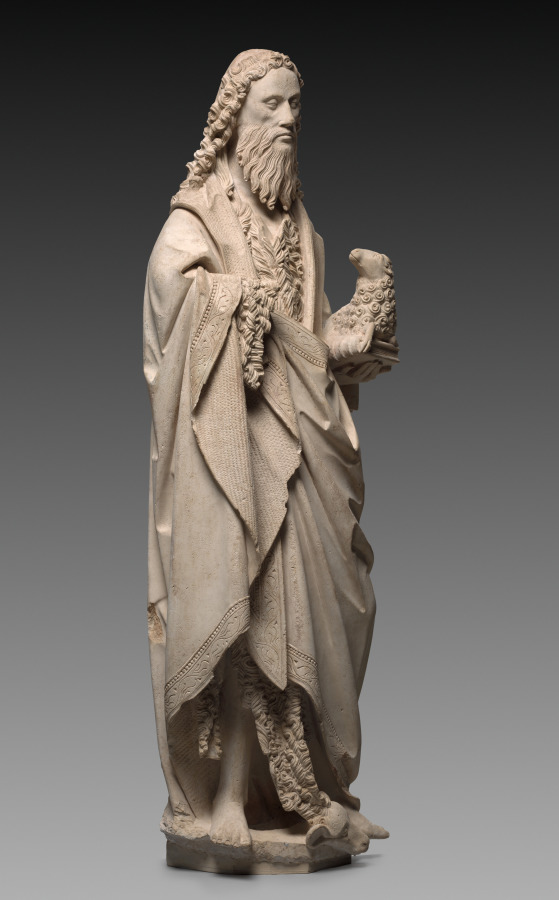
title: Saint John the Baptist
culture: French, Lorraine, Nancy or Bar-le-Duc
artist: attributed to Jan Crocq (Netherlandish, act. 1486–1510)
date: c. 1500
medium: Tonnerre limestone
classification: Sculpture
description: John the Baptist was one of the most beloved and widely venerated saints of the Middle Ages. He is depicted here wearing his traditional camel hair fleece beneath a luxuriant outer mantle. The sculpture is attributed to Jan Crocq, a Netherlandish artist active at the court of René II, Duke of Lorraine at Nancy from 1486 to 1510, and noted for his naturalistic treatment of hair and costume.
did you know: St. John the Baptist holds a book and a lamb, referencing his description of Christ as "the lamb of God."